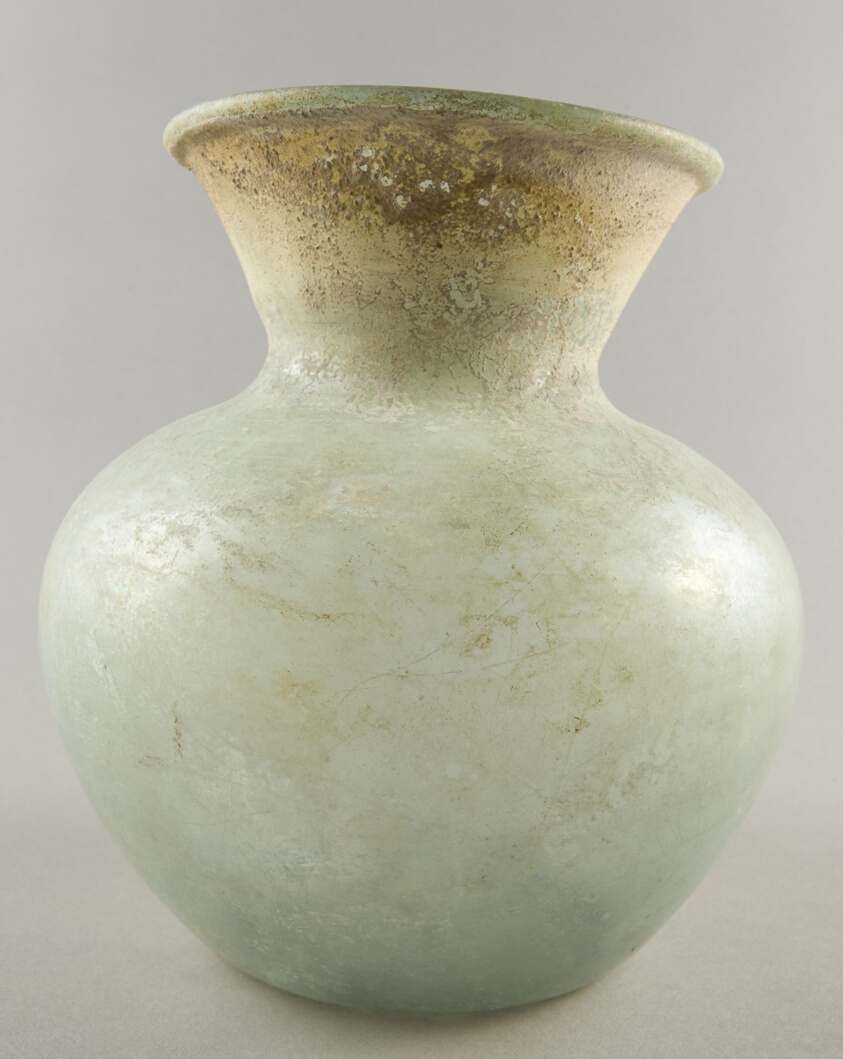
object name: Vessel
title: Jar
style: greco-roman, greco-roman (egyptian)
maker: Roman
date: 2nd-3rd century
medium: Glass, blown technique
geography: Ancient Mediterranean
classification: glass; vessel; ancient art